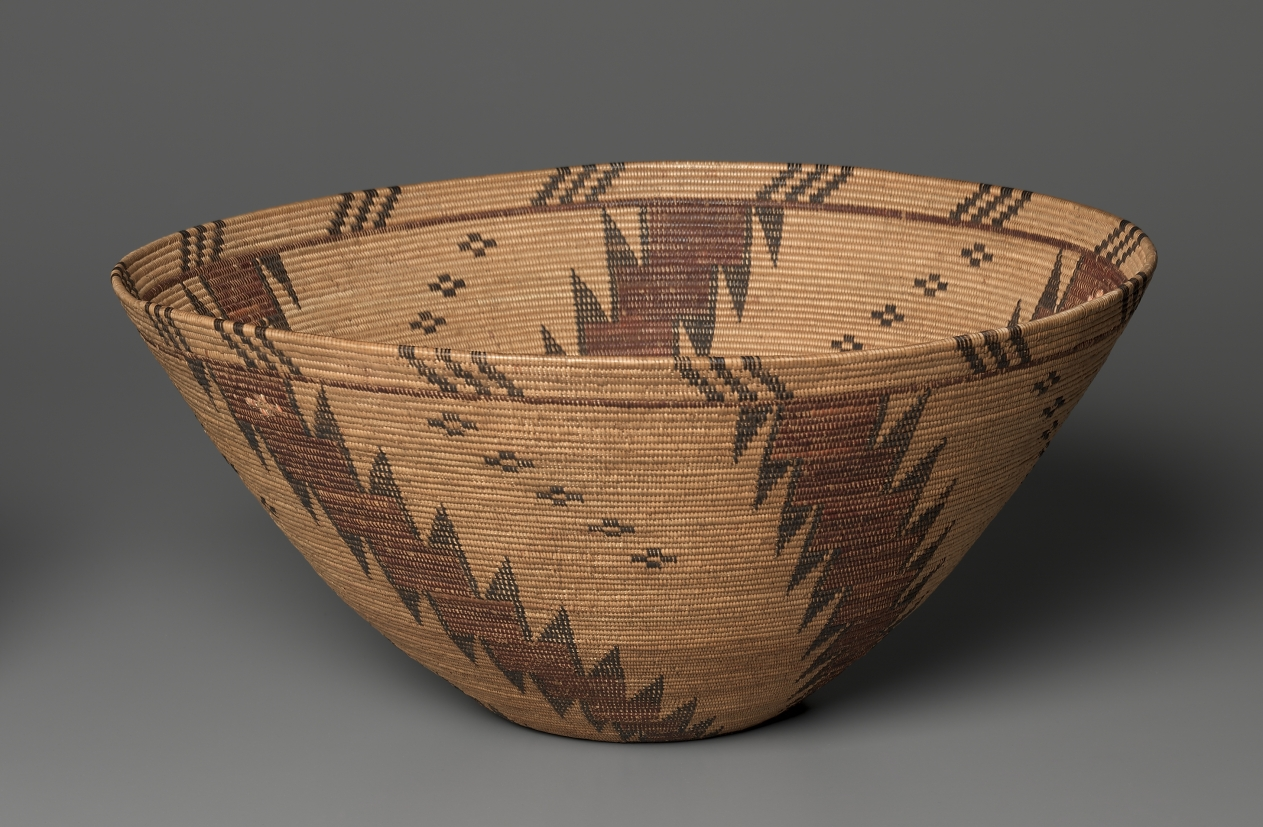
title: Presentation Bowl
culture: Native North America, Great Basin, California, Death Valley, Timbisha (Panamint) Shoshone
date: 1880–90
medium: devil's claw, sumac, yucca root, orange-shafted flicker (woodpecker) quills; coiled (2 rod and bundle of deer grass or basket grass)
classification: Basketry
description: This basket was made for the Euro-American collectors’ market in the early 1900s but it is modeled on basketry bowls from which the Timbisha (Panamint) Shoshone once served food. When used indigenously, the main view would have been of the interior. The two small, pink crosses, made of flicker (woodpecker) quills, may be a maker’s mark. Made-for-sale baskets testify to Indigenous women’s truly creative, resilient responses to forces that endangered their livelihoods and existence.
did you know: The two small, pink crosses on this basket may be a maker’s mark.